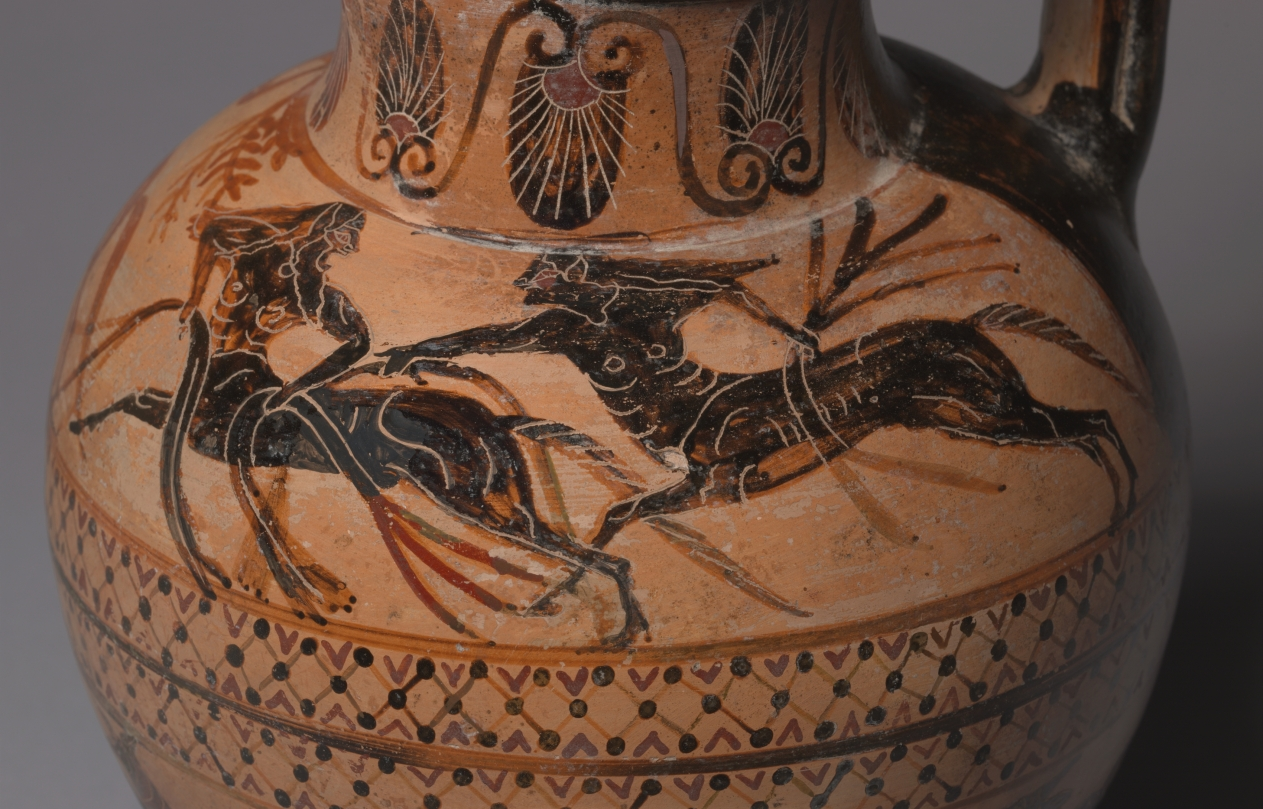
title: Black-Figure Oinochoe (Wine Jug): Hercle (Herakles) and Pholos; Cattle (of Geryon?)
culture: Etruscan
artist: attributed to Tityos Painter (Etruscan, active at Vulci c. 530–510 BCE)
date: c. 520 BCE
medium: ceramic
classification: Ceramic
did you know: This oinochoe or wine pitcher is a type of pottery made by the Etruscans or pre-Italic peoples.